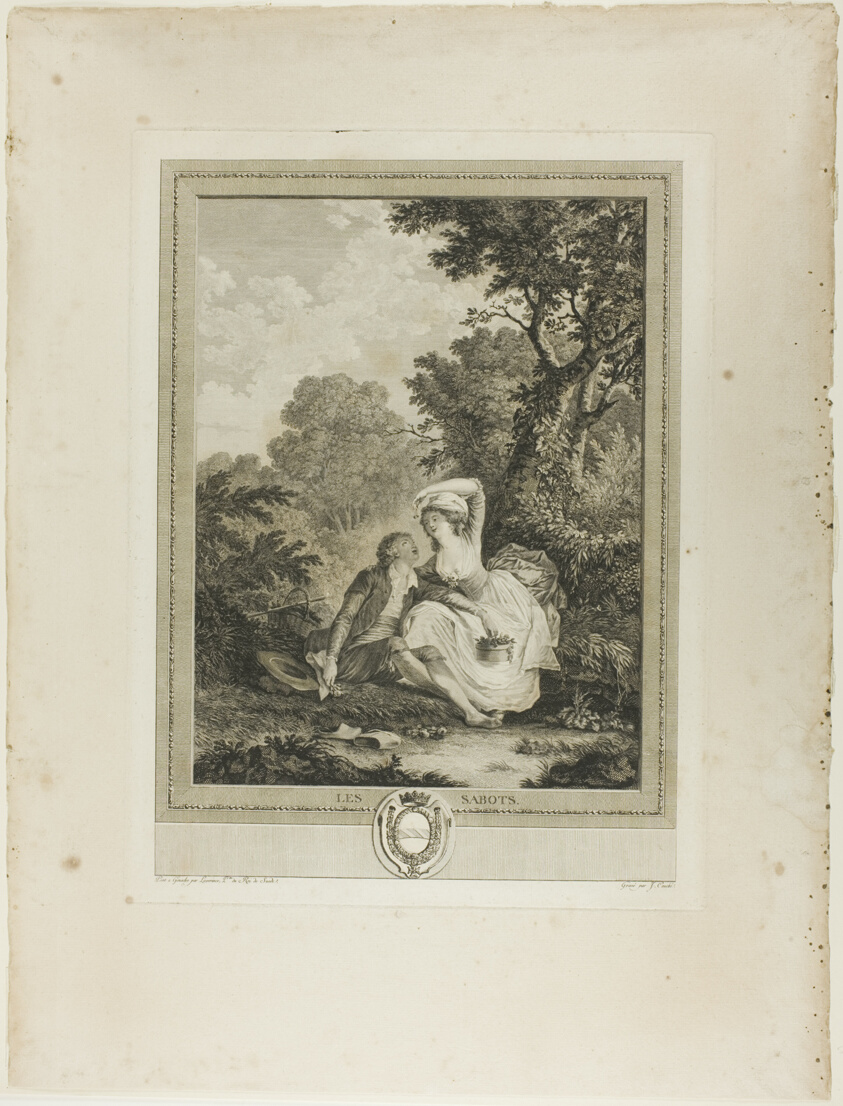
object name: Print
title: Les Sabots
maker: Jacques Couché (French, 1750-1808); after Nicolas Lavreince (Swedish, 1737-1807)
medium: Etching on paper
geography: France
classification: etching; print; prints and drawing